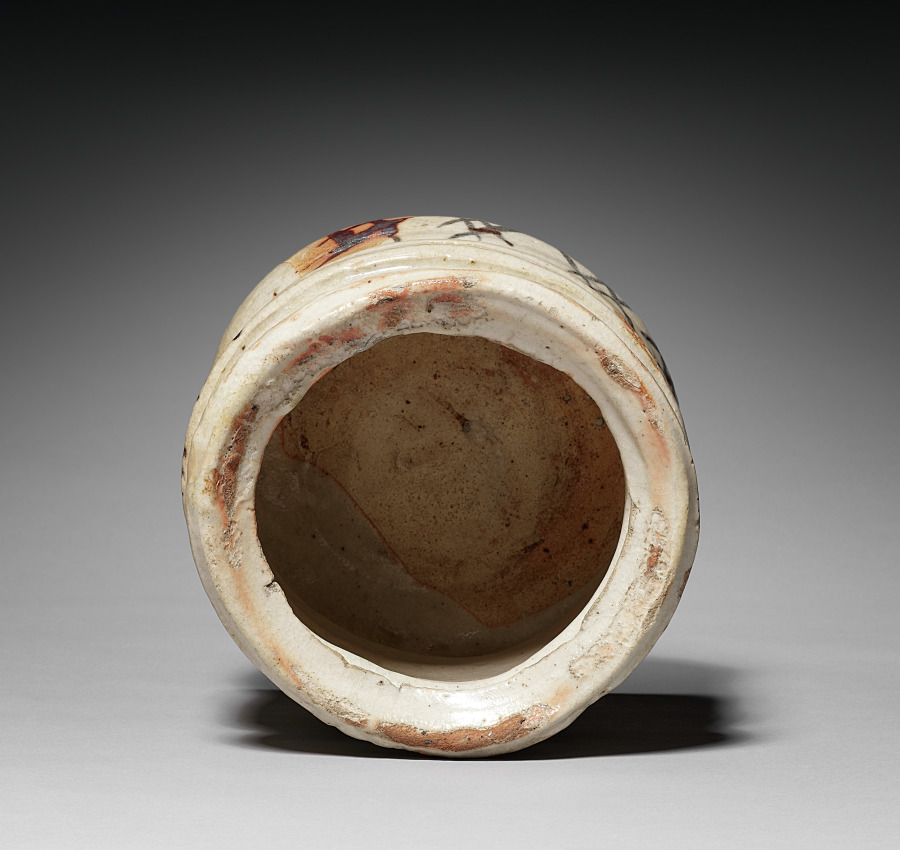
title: Water Container (Mizusashi) with Riverscape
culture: Japan, Momoyama period (1573-1615) to Edo period (1615-1858)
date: late 1500s–early 1600s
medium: Stoneware with underglaze iron oxide slip decoration (Mino ware, Shino type)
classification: Ceramic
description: Mizusashi are jars used to hold water for the preparation of tea at tea gatherings. This one was produced in the Mino area of present-day Gifu prefecture in central Japan, and is considered one of the finest of its type in existence, based on the complex aesthetic sensibilities developed around the tea ceremony in Japan. It is called a “picture Shino” (e-shino) mizusashi, as it has an abstracted design said to resemble an ink painting of reeds along a river bank and small boats in a river on one side, and a geometric pattern on the other. With its irregular shape and thick, luminous glaze, it is of a variety favored by eminent tea masters of the Momoyama period.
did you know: The water this container held during a tea ceremony was used to fill the kama, or iron pot in which the water is heated.